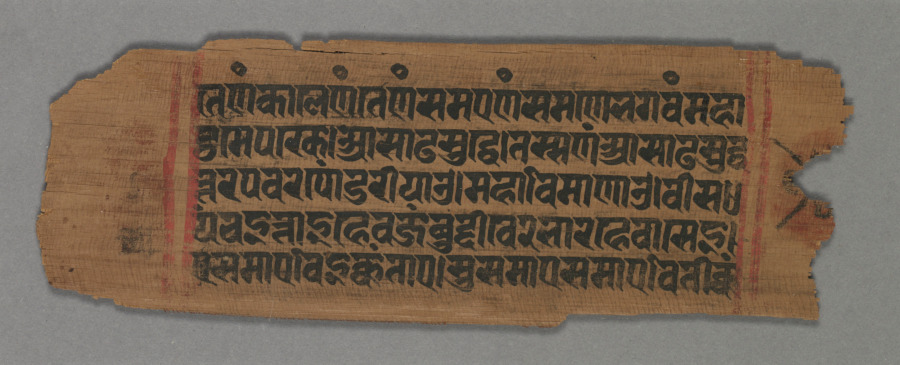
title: Monk Holding a Flower: Folio 2 (recto), from a Kalpa-sutra and Story of Kalakacharya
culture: Western India, Gujarat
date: 1287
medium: gum tempera and ink on palm leaf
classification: Painting